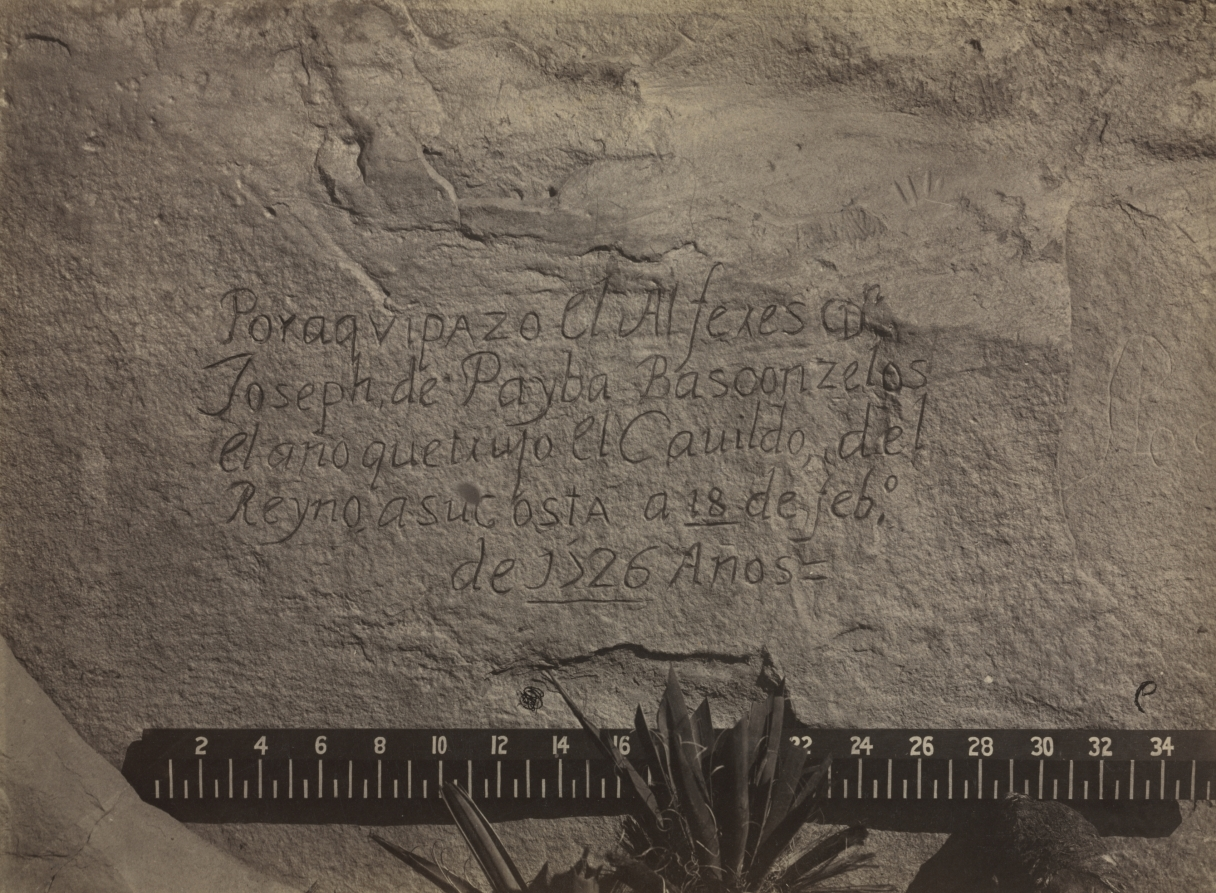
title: Historic Spanish Record of the Conquest, South Side of Inscription Rock, N.M., No. 3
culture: America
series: Geographical & Geological Explorations and Surveys West of the 100th Meridian Expedition of 1873, led by Lt. George M. Wheeler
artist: Timothy H. O'Sullivan (American, 1840–1882)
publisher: The War Department, Corps of Engineers, U.S. Army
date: 1873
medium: albumen print from wet collodion negative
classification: Photograph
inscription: In red pencil on recto: "1873-#9"; in pencil on recto: "4648"; "917.8 [checkmark] / U.S. Eng. Dept. / Geographical and geological explorations & surveys west of the 100th meridian / Expedition of 1873 [underlined]. Lieut. Col. Geo M. Wheeler com'd'g/.(-Photo.no.9)"; "Spanish invaders cut inscriptions on these / walls, as they passed by, to conquer, in the / name of their king & church."